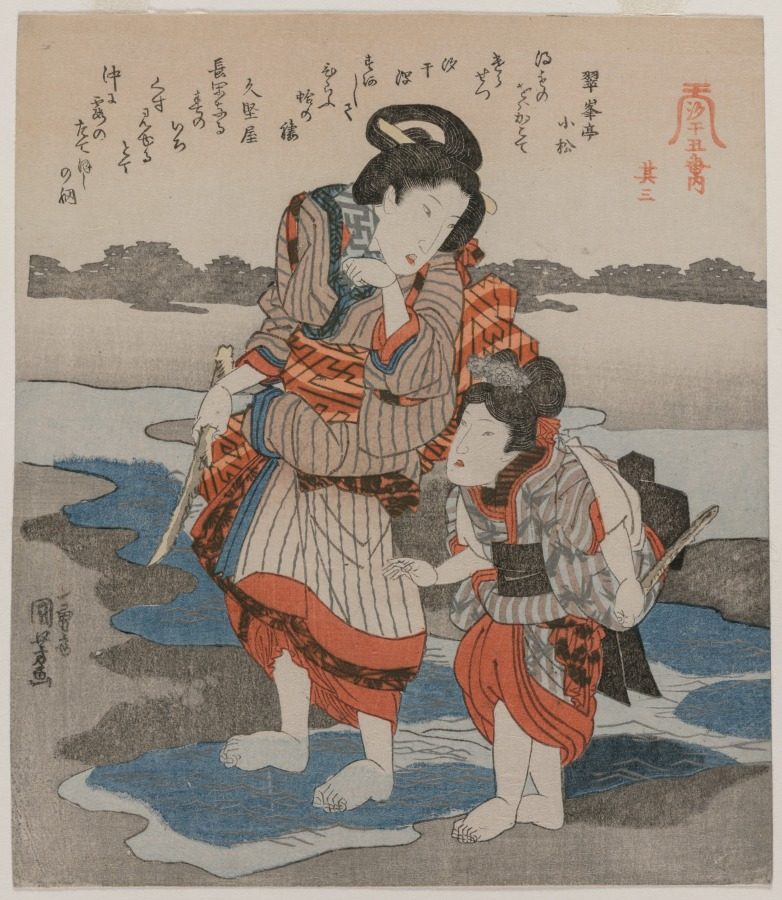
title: Third Print from A Low Tide Pentaptych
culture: Japan, Edo period (1615–1868)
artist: Utagawa Kuniyoshi (Japanese, 1797–1861)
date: c. 1830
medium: color woodblock print from a pentaptych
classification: Print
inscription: Signature: Ichiyusai Kuniyoshi ga.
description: This is one of five surimono, privately commissioned prints, making up an image of people collecting sea life at low tide. Ten witty poems, written by members of a poetry circle, appear across the upper part of the composition, with two poems on each print. Based in Edo (now Tokyo), the group was led by Hisakataya Misora (active 1810s–30s), who wrote four of the poems. This composition may have been printed in April, which was considered the best time for beachcombing.